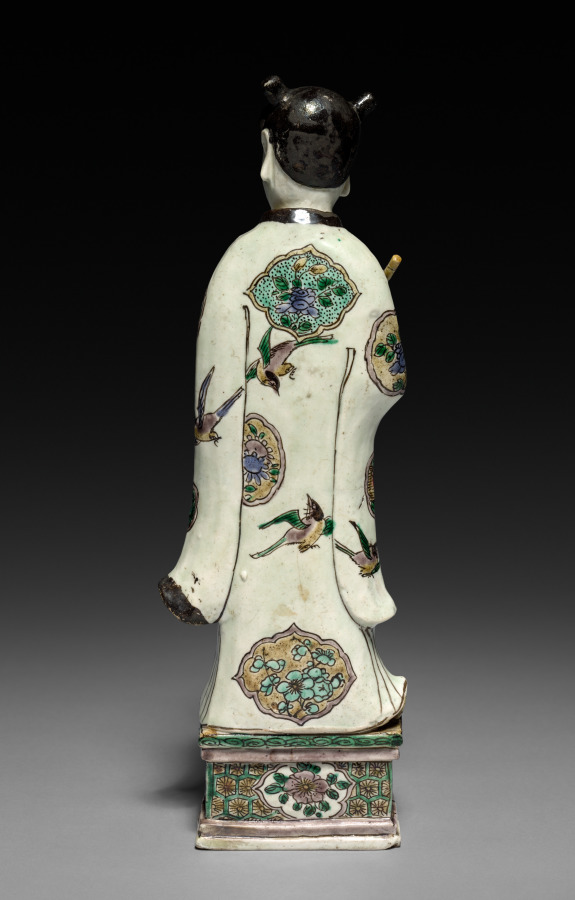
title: Daoist Immortal Han Xiangzi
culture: China, Jiangxi province, Jingdezhen kilns, Qing dynasty (1644-1911), Kangxi reign (1662-1722)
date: 1662–1722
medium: porcelain with famille verte overglaze enamel decoration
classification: Ceramic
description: One of the Eight Immortals, Han Xiangzi was said to be the nephew of the famous Tang dynasty poet Han Yu (768–824). He is usually shown as a young boy holding a flute. Han is wearing a white robe decorated with peonies, hinting at his identity as the patron of florists and his legendary ability to make peonies bloom in winter. A four-clawed dragon, a decorative motif typically used for imperial nobility and certain high-ranking officials, decorates Han’s robe.